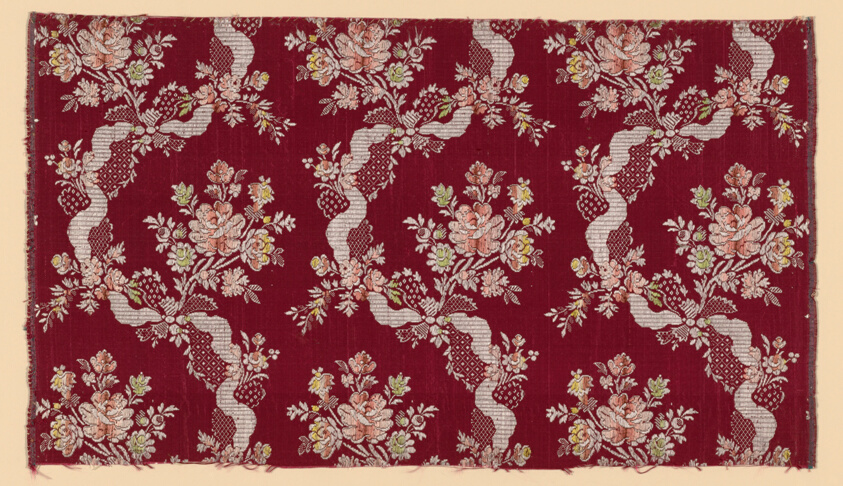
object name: Textile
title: Panel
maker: France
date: 1750/75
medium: silk; plain weave with additional patterned warps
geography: France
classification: textile; weaving